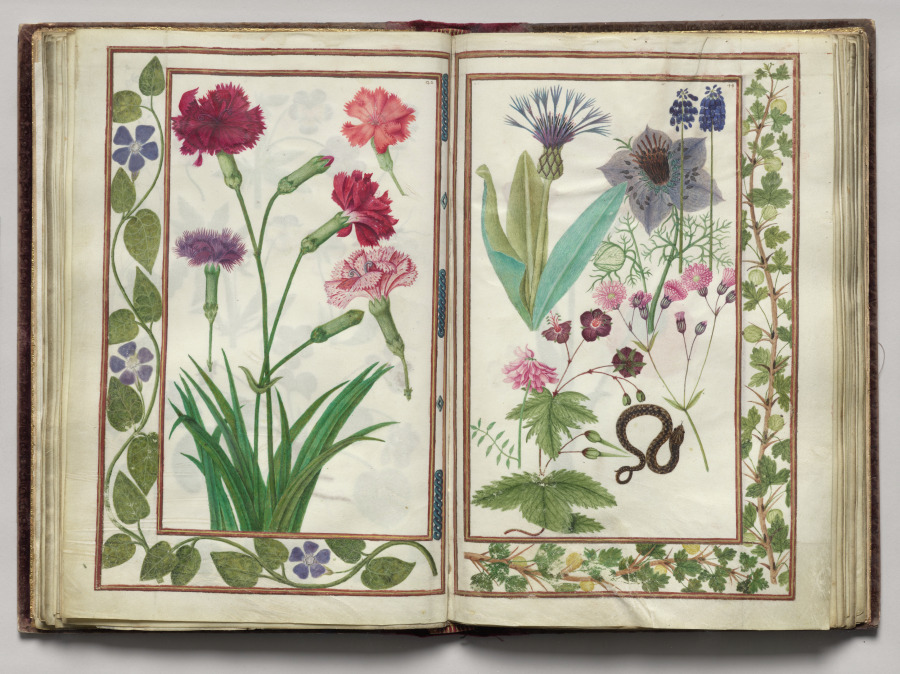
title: Florilegium (A Book of Flower Studies)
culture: France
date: 1608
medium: bound manuscript of 48 leaves, 77 drawings; watercolor, ink, silver, and gold over occasional traces of pencil, on vellum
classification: Bound Volume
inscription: Dated: Poitiers 1608 (on frontispiece) Signed: On frontispiece in black ink, lower right: Van Kuyk Notation on drawing: Frontispiece: in pencil, lower margin: * élève de Van Kessel, peintre flammand (* in pencil also appears in front of Van Kuyk's name).